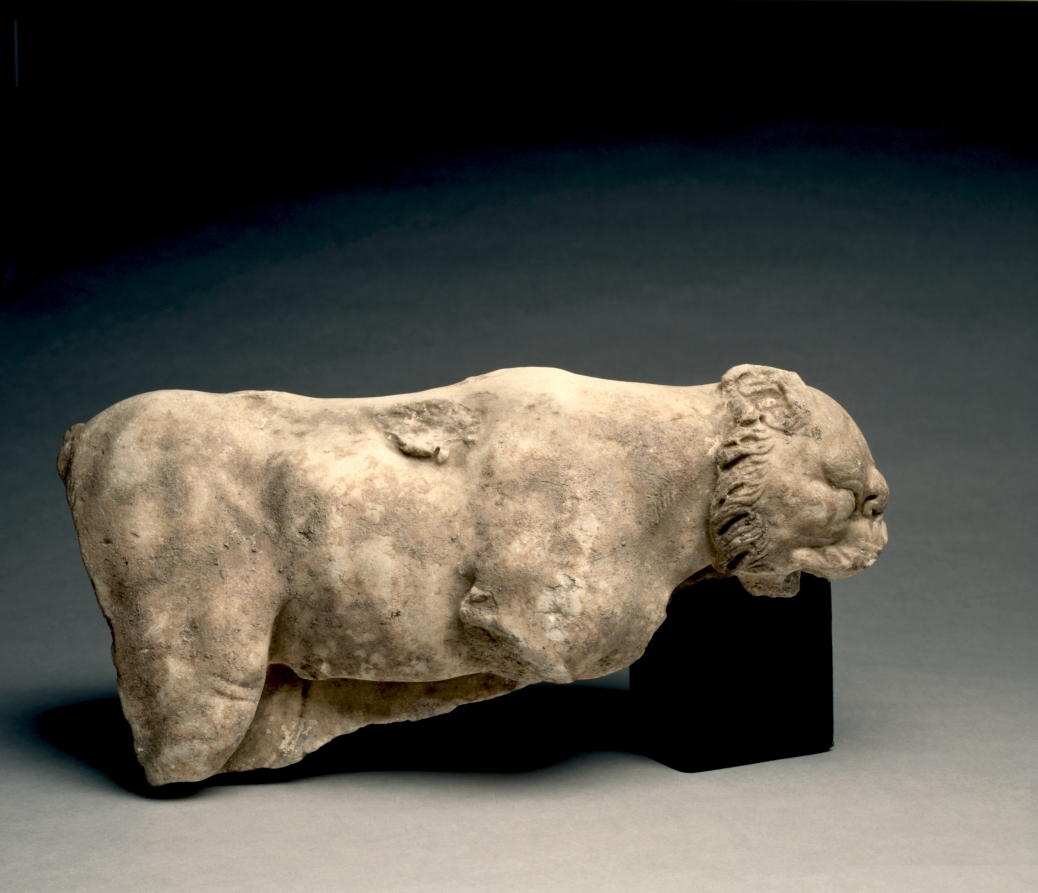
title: Fragment of a Panther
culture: Greece, Hellenistic period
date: 100s BCE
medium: marble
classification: Sculpture